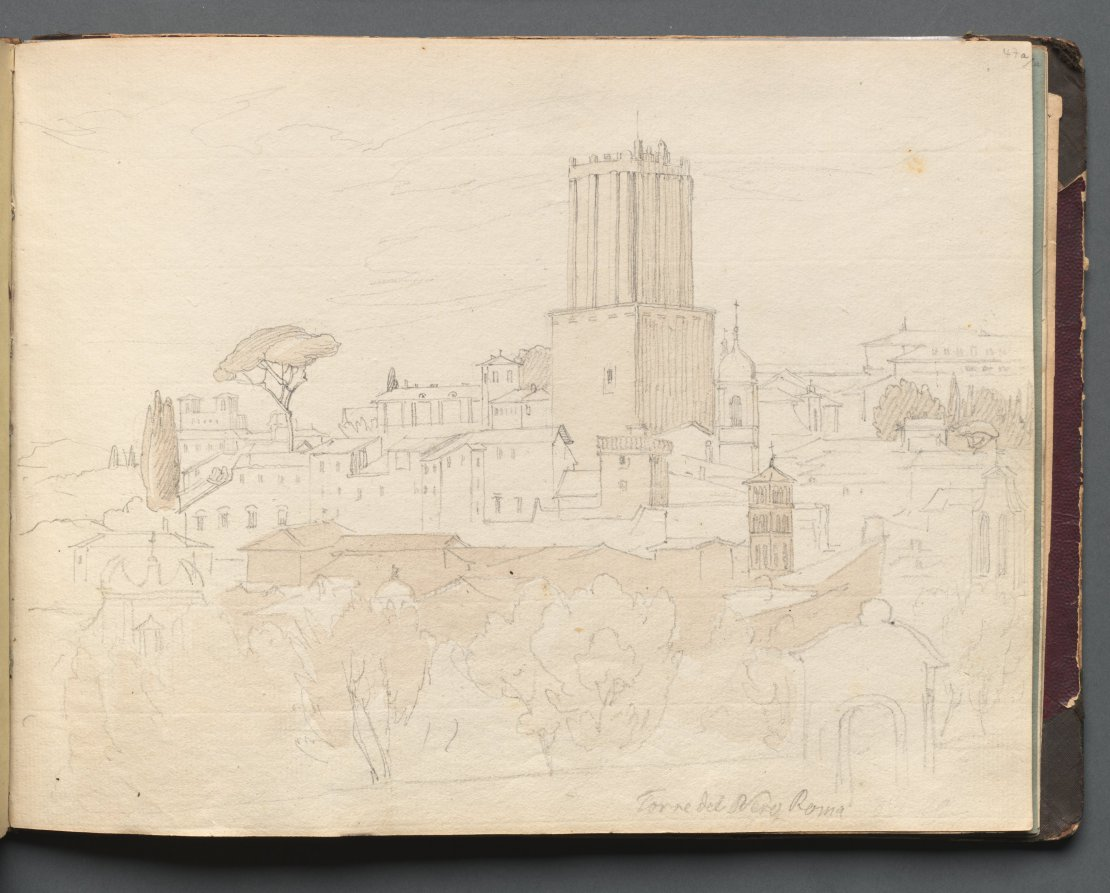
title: Album with Views of Rome and Surroundings, Landscape Studies, page 47a: " Torre del Nero, Rome"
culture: Germany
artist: Franz Johann Heinrich Nadorp (German, 1794–1876)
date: c. 1830s-70s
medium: graphite and brown wash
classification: Bound Volume